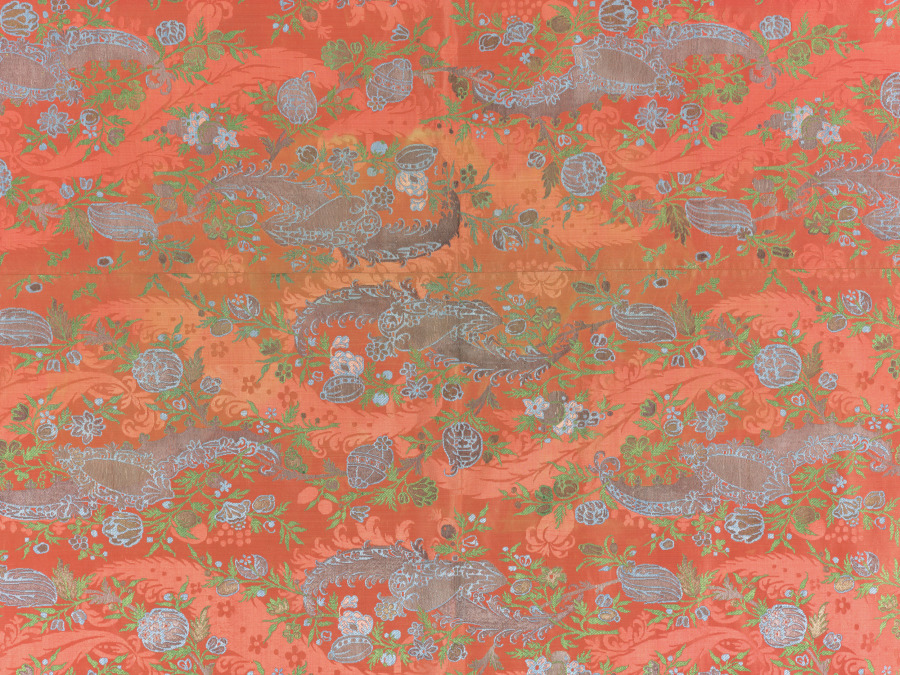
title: Fragment of a Cope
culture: Italy, Venice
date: 1700s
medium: brocade; silk and metal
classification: Textile